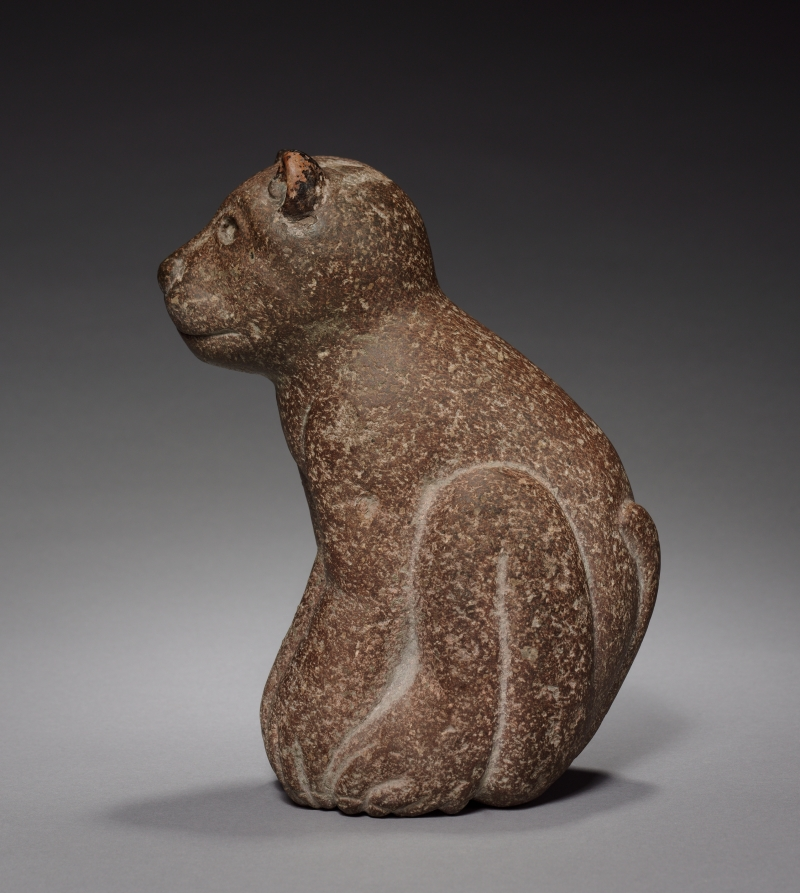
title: Feline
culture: Central Mexico, Aztec, 13th-16th century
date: c. 1200–1519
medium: stone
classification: Sculpture